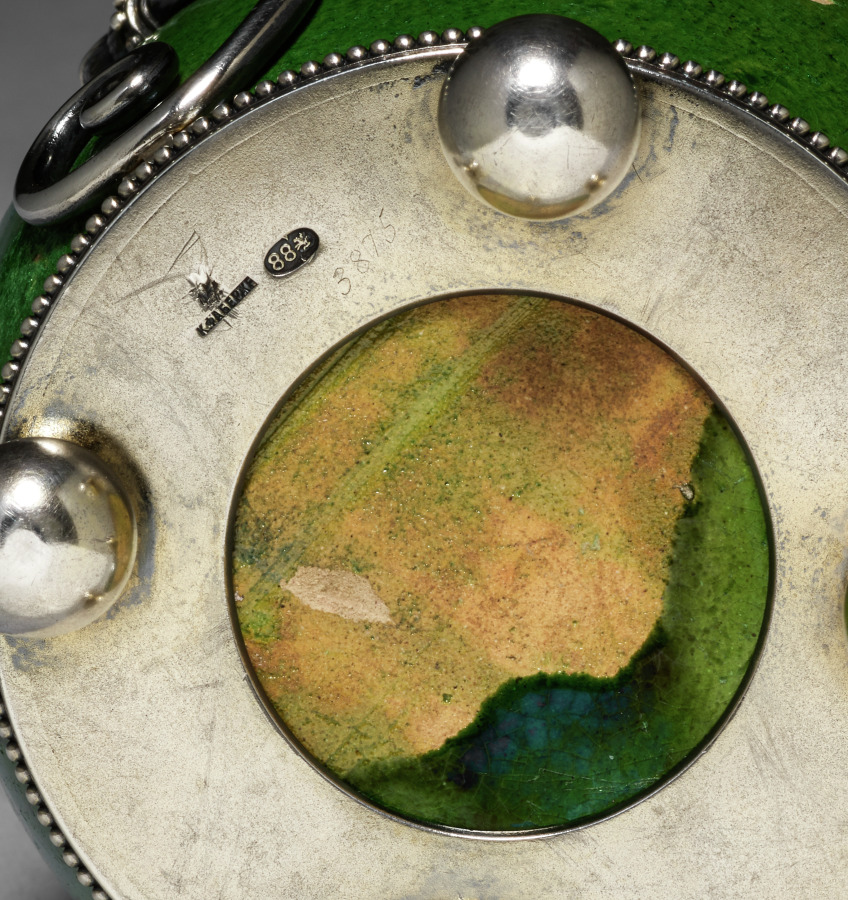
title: Vase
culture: Russian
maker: House of Fabergé (Russian, 1842–1918)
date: c. 1890–99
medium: ceramic, silver-gilt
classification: Ceramic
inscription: Inscribed “K. Fabergé” in Cyrillic, surmounted by the double headed Imperial eagle.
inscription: “88” silver standard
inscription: St. Petersburg coat of arms (St. George and the dragon)